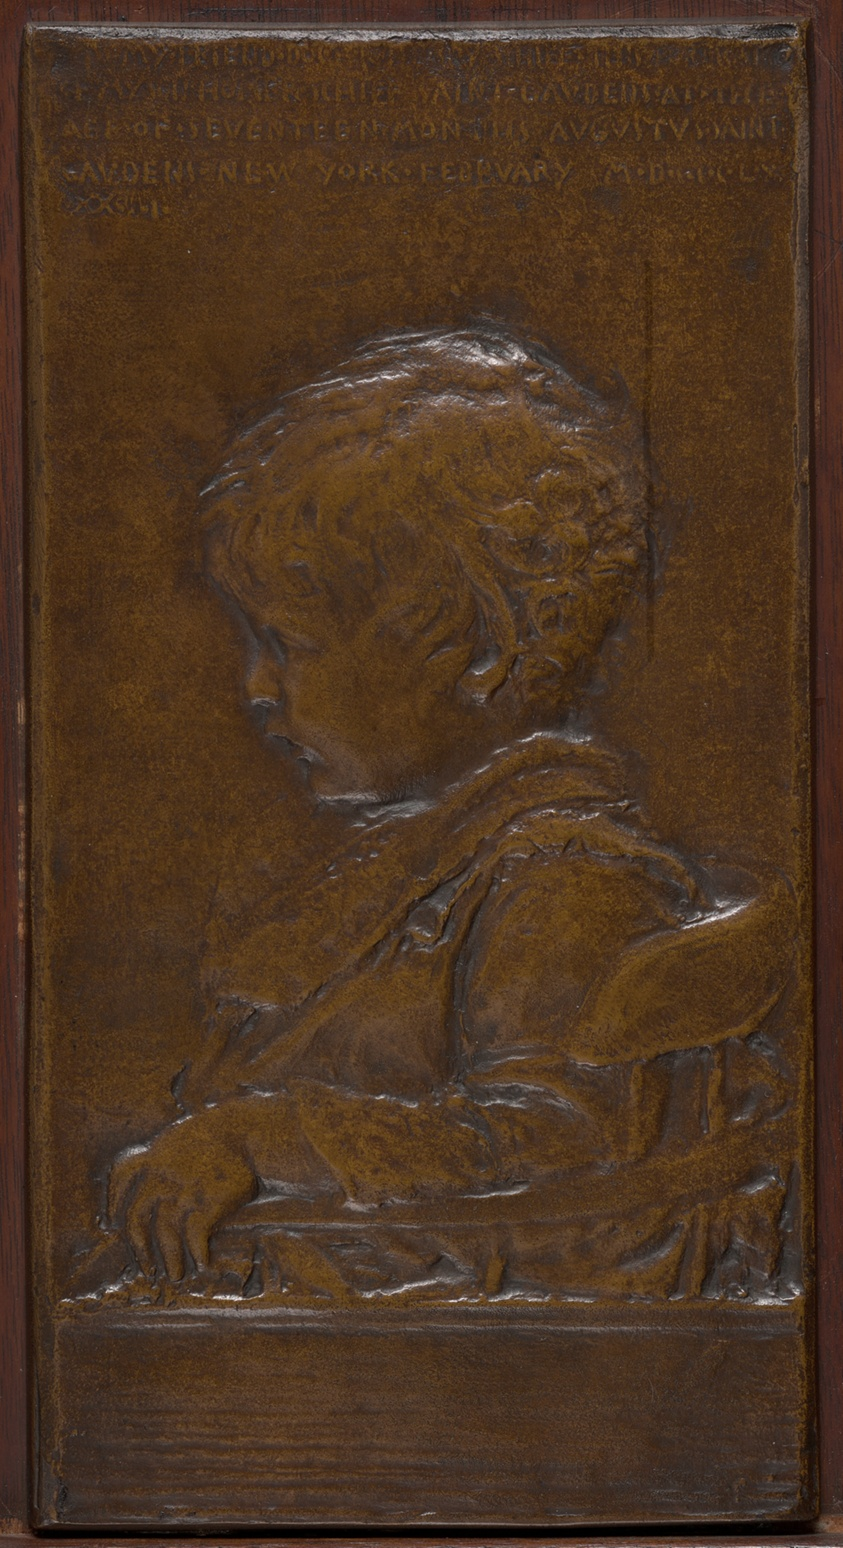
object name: Sculpture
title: Homer Schiff Saint-Gaudens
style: 19th century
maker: Augustus Saint-Gaudens (American, born Ireland, 1848–1907)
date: Modeled 1882, cast c. 1907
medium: Bronze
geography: United States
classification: sculpture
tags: portrait, portraits: child subject, portraits